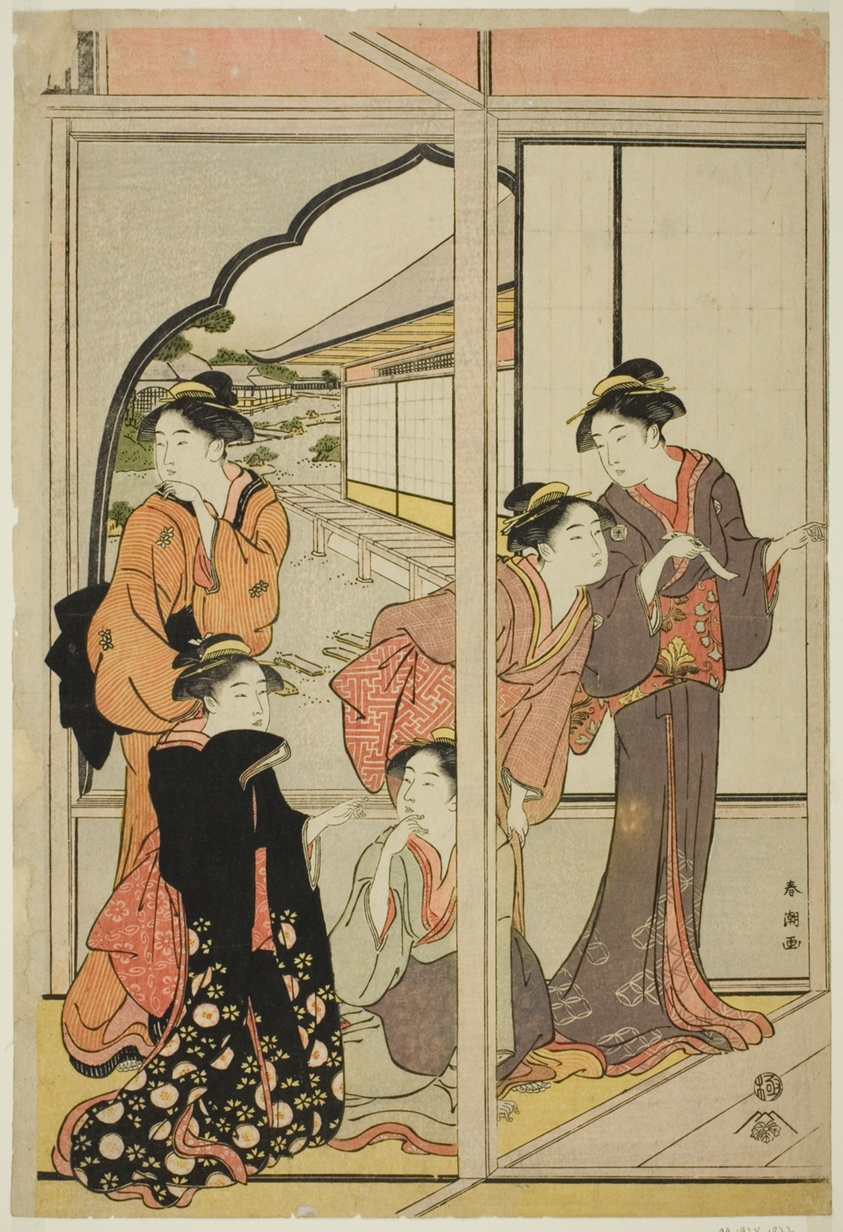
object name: Print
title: Women in a Mansion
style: Japanese (culture or style)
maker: Katsukawa Shuncho; Japanese, active c. 1780-1801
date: c. 1780/1801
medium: Color woodblock print; left sheet of oban triptych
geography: Japan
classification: woodblock print; print; asian art